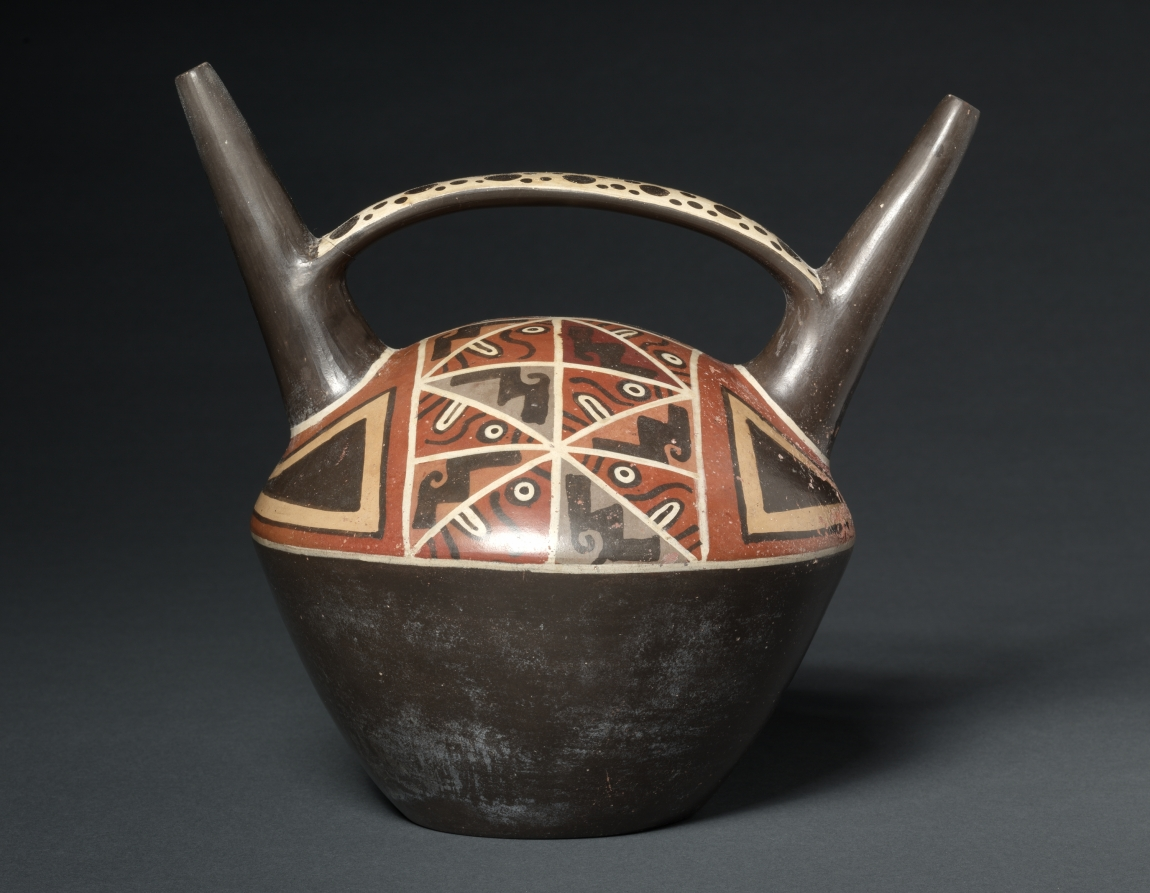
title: Double-Spouted Vessel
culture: Peru, Wari style, 6th-10th century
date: 500–900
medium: ceramic, slip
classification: Ceramic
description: This vessel was created during the time of the Wari culture, a superpower of the Andes mountains whose influence was felt in adjacent coastal areas, where this ceramic was made. Across the top of the vessel's chamber is a repeated design, a profile face and stepped fret, the meaning of which remains enigmatic. It also appears on Wari tapestry tunics, high-status garments worn by officials of the Wari state. The painting on the strap handle is quite unusual; it may represent stylized feline pelage.